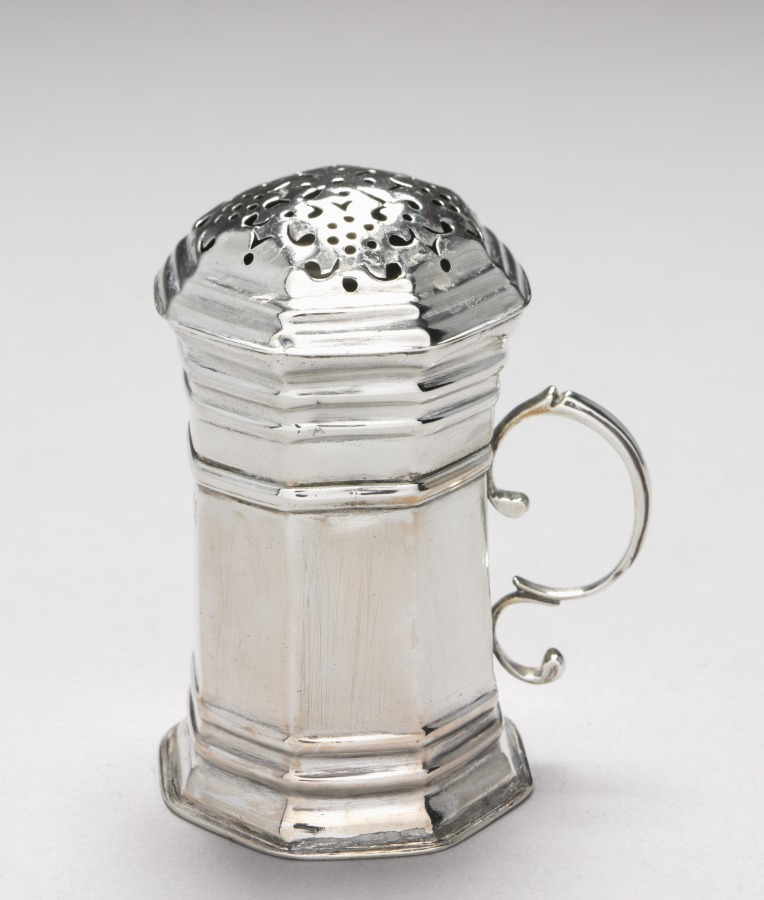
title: Caster with Lid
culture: America, Massachusetts, Boston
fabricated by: Andrew Tyler (American, 1692–1741)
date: c. 1720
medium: silver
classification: Silver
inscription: engraved: "M" over "D * L" in shaded block letters on bottom, and "AM" in block letters on front, opposite handle.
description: A caster was used to spread a finely ground substance, probably pepper.